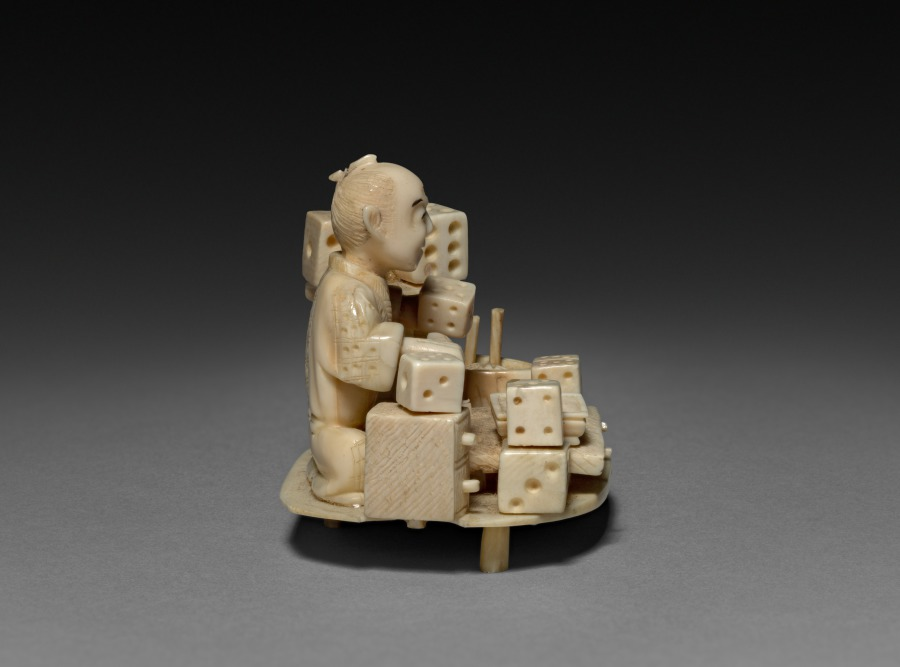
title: Man with Dice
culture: Japan, Edo period (1615–1868) to Meiji period (1868–1912)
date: 1800s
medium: ivory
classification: Netsuke